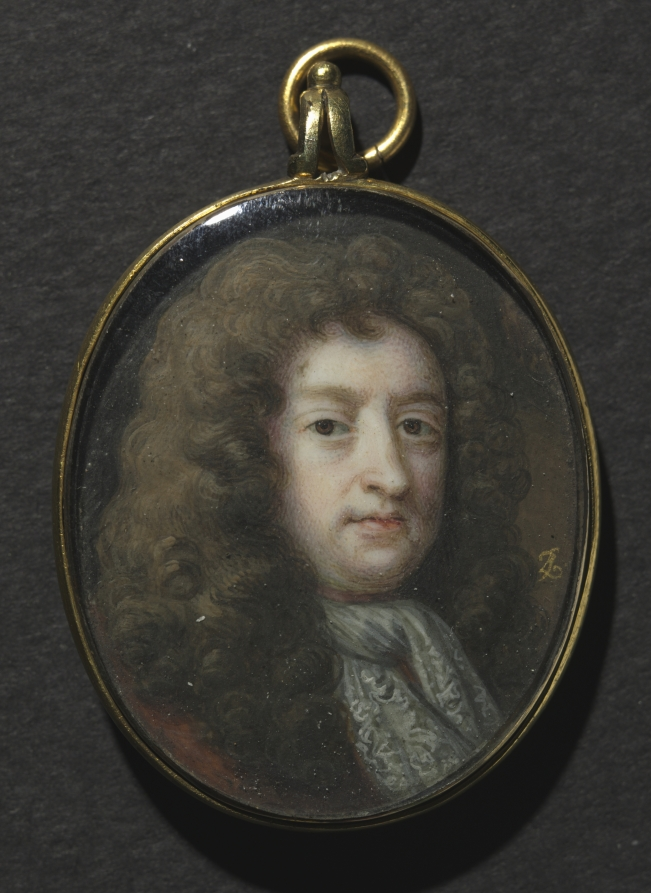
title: Portrait of Samuel Butler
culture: England, early 18th century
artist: Bernard Lens (British, 1681–1740)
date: c. 1715–20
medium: watercolor on ivory in a period metal frame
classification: Portrait Miniature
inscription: signed right: BL [in monogram]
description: Bernard Lens III was the most renowned member of an artist dynasty. His namesake father was a printmaker, his grandfather a painter, and two of his own sons became artists. Lens III was a critical figure in miniature painting as the art form transitioned away from painting on vellum. During the first decade of the eighteenth century, he established ivory as the primary miniature support in Britain, probably having seen the pioneering work of Rosalba Carriera (1675–1757) brought to England from Venice during the flowering of the Grand Tour. The earliest known miniatures by Lens were painted on vellum around 1707, with examples on ivory appearing shortly thereafter. Lens spent his career in London, Bristol, and Bath while also traveling to the country estates of his influential patrons. He was painter to kings George I and George II, as well as drawing instructor to princesses Mary and Louise, the Duke of Cumberland, and Horace Walpole (1717–1797). The sitter, Samuel Butler, turns slightly to the left and has brown eyes. A small portion of his dull red coat is visible, and he wears a white lace cravat twisted around his neck in a loose knot—an essential element of a gentleman’s dress that was fashionable between the 1670s and 1690s and unlike the broad lace or linen collars that dominated in the early and mid-seventeenth century. A long, brown, curled wig falls past his shoulders, and one comma-shaped curl is arranged at the center of his forehead. Butler’s voluminous wig occupies half of the painted surface. During the 1660s gentlemen regularly wore wigs, and while they offered a practical solution to such predicaments as hair loss, graying, and lice, wigs were subject to the vicissitudes of fashion. The wig style seen here is that of the late seventeenth century. Around 1680 it became the norm to part the long wig at the center, which by 1700 resulted in two pronounced tufts on either side, a style not yet exhibited in this portrait. Butler was a poet and satirist popular at the court of King Charles II (reigned 1660–1685). He is primarily remembered as the author of Hudibras, a mock-heroic epic poem satirizing Puritanism written during the English civil war and published between 1663 and 1678.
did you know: Lens often signed his work in monogram; this gold signature is well preserved on this example.